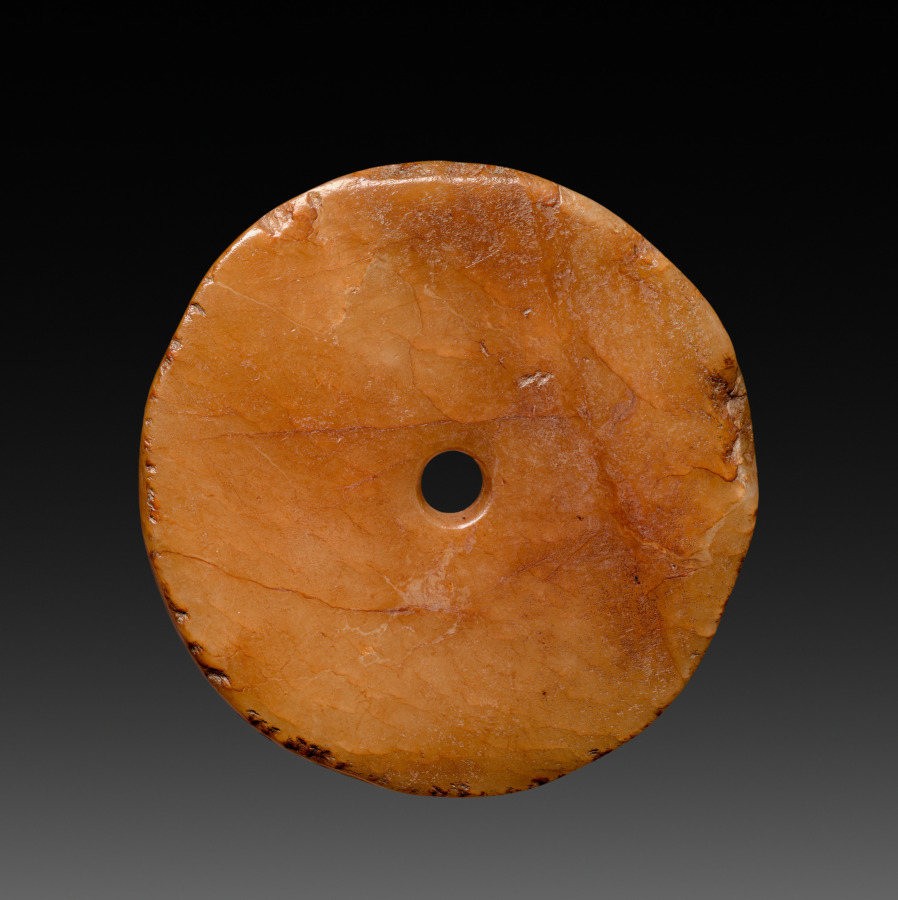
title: Round Ornament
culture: China, Han dynasty (202 BCE–220 CE)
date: 206 BCE–220 CE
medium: jade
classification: Jade